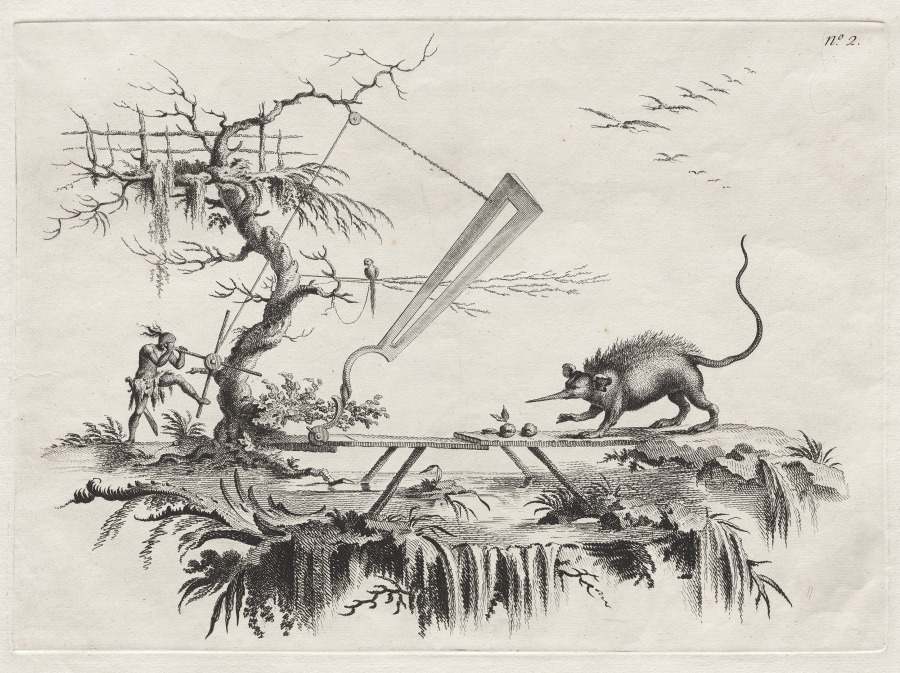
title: A new device to cleave wild beasts from Head to Tail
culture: Italy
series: Suite of the Most Notable Things Seen by John Wilkins Erudite English Bishop during His Famous Voyage from the Earth to the Moon … dedicated to Sir William Hamilton ambassador to the Court of Naples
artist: Filippo Morghen (Italian, 1730–after 1807)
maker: possibly after Jean-Pierre-Louis-Laurent Hoüel (French, 1735–1813)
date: about 1769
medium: etching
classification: Print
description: Filippo Morghen’s set of 10 etchings is outstanding among visual narratives of imaginary voyages to the moon, both visual and literary, that intrigued 18th-century European audiences. A title page and nine plates depict the imagined lives and economy of moon dwellers. These include modes of transport such as large birds and sailboats propelled by giant bellows, enormous scissors for capturing wild beasts (including an oversized rat), and the use of giant pumpkins as fishing boats and as dwellings. Representations of the moon dwellers are based on inaccurate and imaginary European interpretations of Asian, Ottoman, and Native American cultures—called chinoiserie and turquerie—that permeated the decorative and visual arts of the period.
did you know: Morghen based this print series on three books dedicated to moon exploration, including Bishop Francis Godwin’s The Man in the Moone (1640).